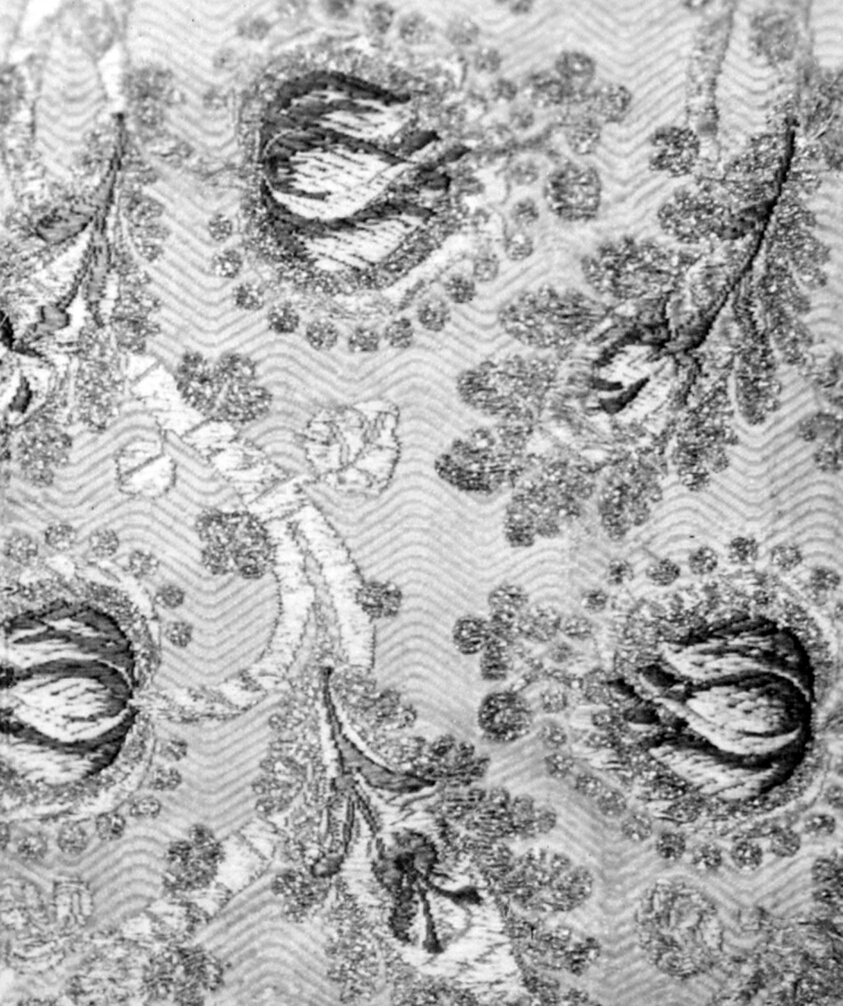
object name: Textile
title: Fragment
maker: France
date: c. 1700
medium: brocaded silk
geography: France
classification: textile; weaving